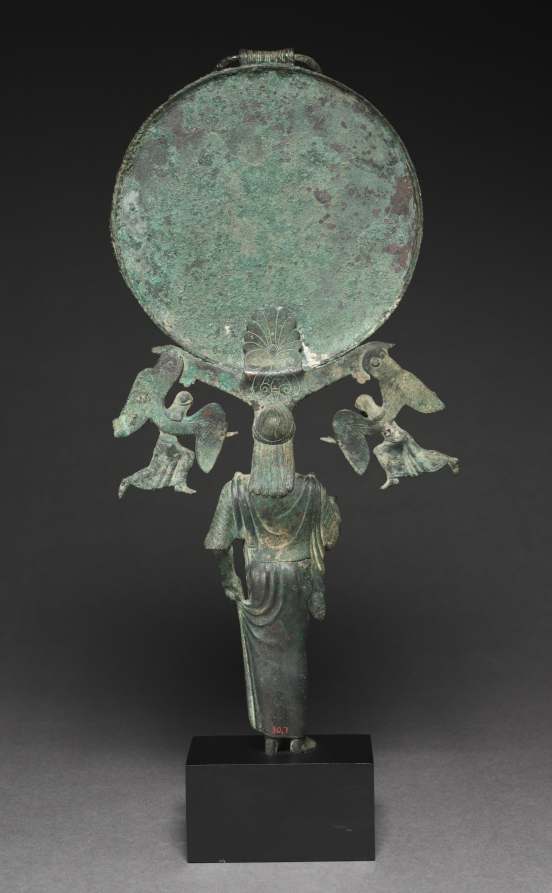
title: Mirror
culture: Greece, Sicyon(?)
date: c. 470–460 BCE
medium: bronze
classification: Metalwork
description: Named for their figured handles, Greek caryatid mirrors may derive from similar types created in ancient Egypt many centuries earlier (like CMA 1983.196). Greek caryatid handles typically take the form of a beautiful, draped woman like this one, whether mortal or divine (perhaps the love goddess Aphrodite). Often, she holds a small offering, here a flower. The small, winged women (Nikai) flanking her are unusual among such mirrors, which often feature Erotes in this position. In antiquity, the unadorned disk would have been highly polished and reflective, and the figure would have stood on an integrated base.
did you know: The term caryatid from classical architecture refers to the female figure serving as a support.